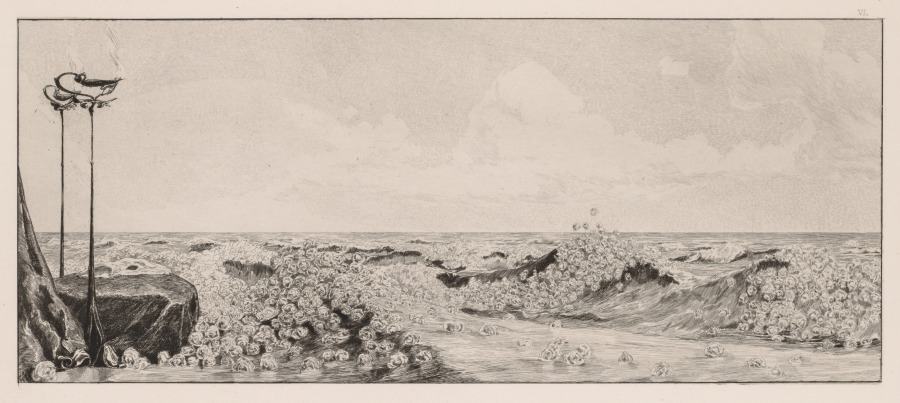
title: A Glove: Homage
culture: Germany, 19th century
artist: Max Klinger (German, 1857–1920)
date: 1880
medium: etching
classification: Print